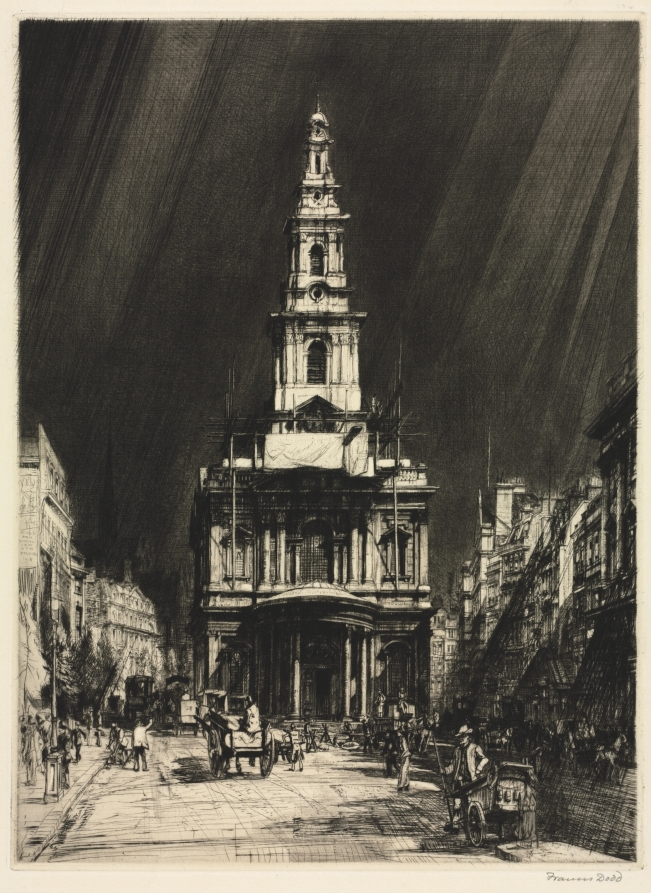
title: Strand with Sky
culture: England, 20th century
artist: Francis Dodd (British, 1874–1949)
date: 1916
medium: etching with drypoint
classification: Print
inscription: signed lower right in pencil: "Francis Dodd" bottom left of page in pencil: "24 8123"